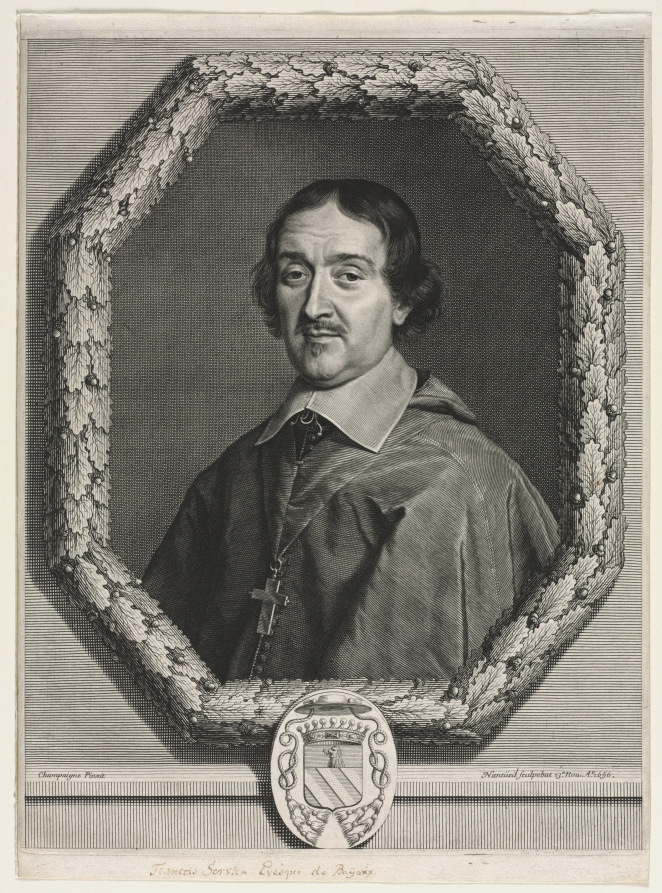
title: François Servien, Bishop of Bayeux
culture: France, 17th century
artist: Robert Nanteuil (French, 1623–1678)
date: 1656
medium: engraving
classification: Print